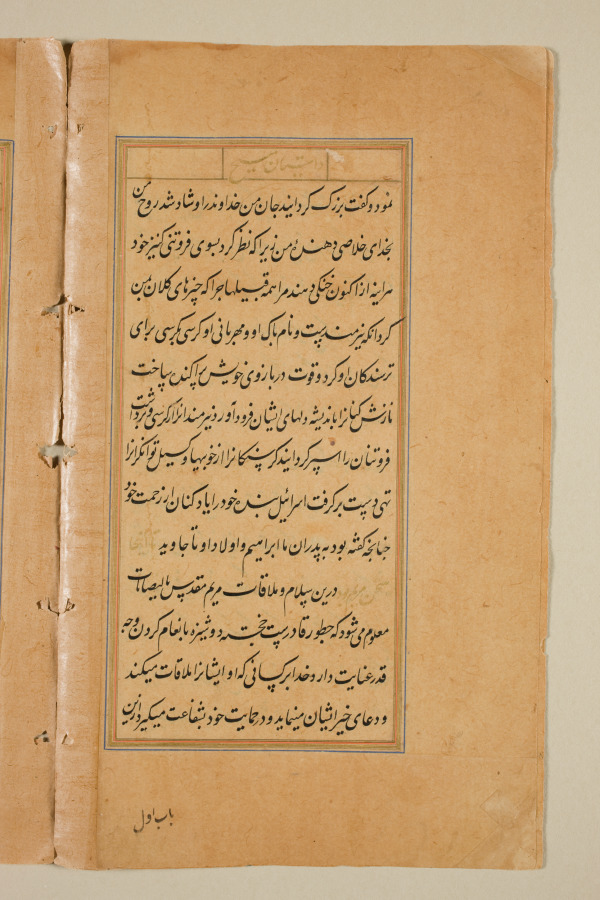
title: Text page from a Mirror of Holiness (Mir’at al-quds) of Father Jerome Xavier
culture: Mughal India, Allahabad, made for Prince Salim (1569–1627)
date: 1602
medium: Ink and gold on paper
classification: Manuscript